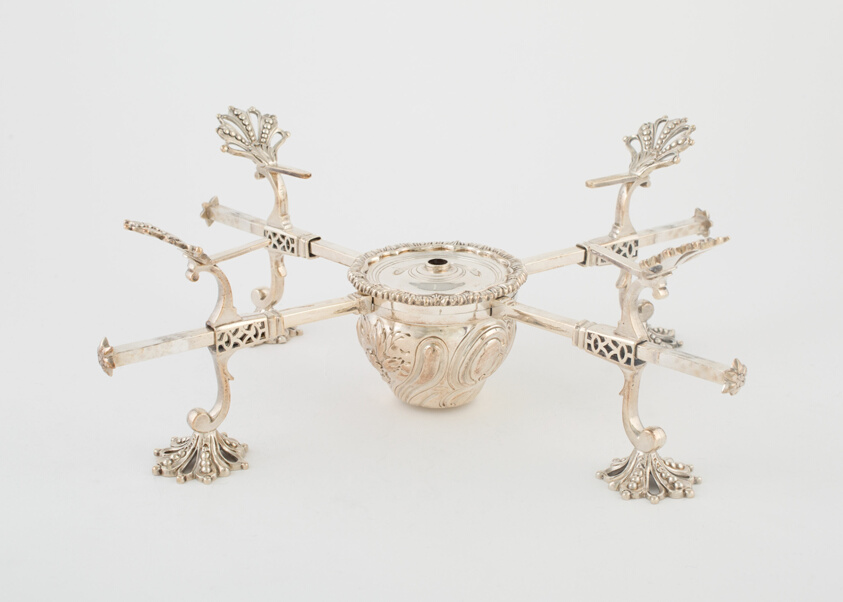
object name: Metalwork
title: Dish Cross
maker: Richard Mills; English, active 1755-68; London, English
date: 1768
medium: Silver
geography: London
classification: tableware; silver; metalwork; european decorative arts